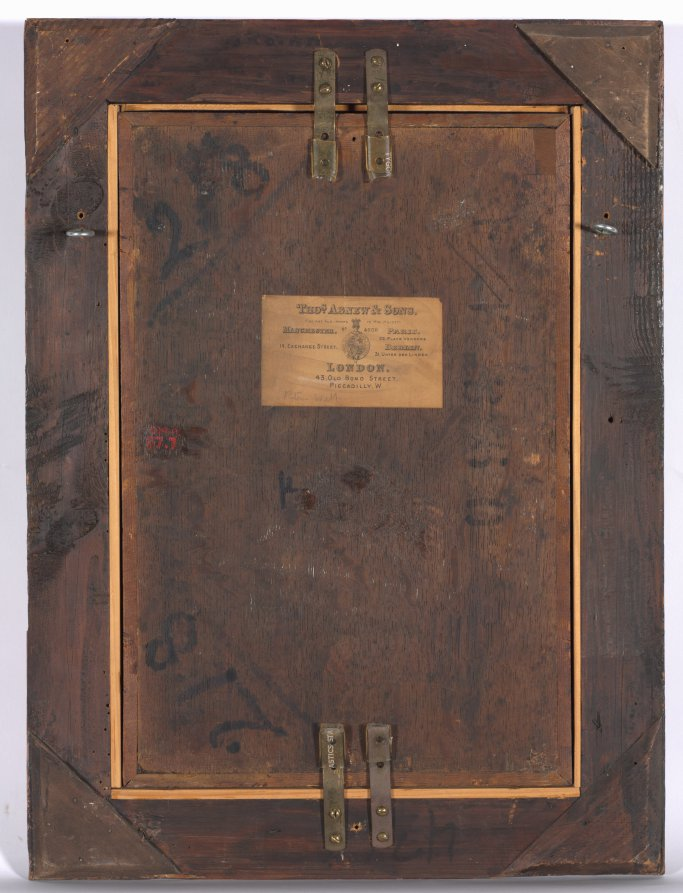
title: Study for "The Assumption of the Virgin" for San Augustín, Seville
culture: Spain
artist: Juan de Valdés Leal (Spanish, 1622–1690)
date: c. 1670–72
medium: oil on wood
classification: Painting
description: This painting is a sketch for a large altarpiece. The rough, flickering surface, the unusually sharp contrast of hot and cool hues, and the compression of space all characterize the artist’s intense spirituality and unique technique. While often held apart from the sweetness and grace of Murillo (also represented in the collection), his contemporary in Seville, the two artists worked closely together on commissions and often presented their work side by side, speaking to the stylistic diversity and religious complexity preferred by patrons in Seville during the late 1600s.